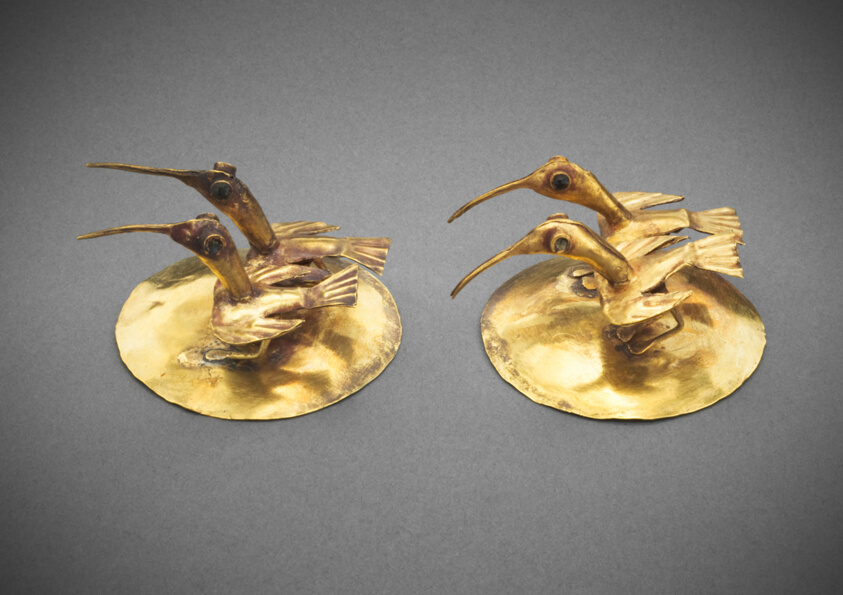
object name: Costume and Accessories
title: Ear Ornaments with Ibis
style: inca, americas, andes, Arts of the Americas, andean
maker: Inca (Ica Valley, south coast, Peru)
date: 1200–1450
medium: Gold with garnet inlay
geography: Ica Valley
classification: ear ornament; gold; jewelry; art of the americas; costume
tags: birds, animals